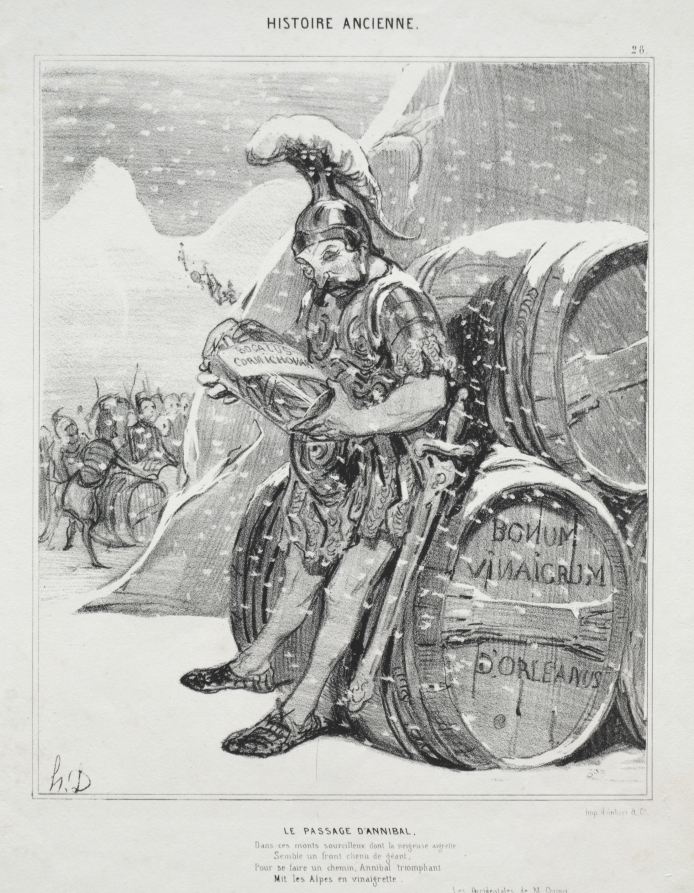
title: Hannibal's Crossing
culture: France, 19th century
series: Ancient History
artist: Honoré Daumier (French, 1808–1879)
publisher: Aubert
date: 1842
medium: lithograph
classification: Print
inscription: Upper margin, in pencil: H.D. 1928 / L.D. 952 ; lower margin, printed: Imp. d'Aubert & Cie. ; in pencil: LeS. III/III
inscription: Above image, printed: HISTOIRE ANCIENNE. / 28 ; below the image, printed: "LE PASSAGE D'ANNIBAL. / Dans ces monts sourcilleux dont la neigeuse aigrette / Semble un front chenu de géant, / Pour se faire un chemin, Annibal triomphant / Mit les Alpes en vinaigrette. / Les Occidentales de Mr. Quinet."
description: This print was published in Le Charivari (October 6, 1842) as plate 28 from the series Ancient History.